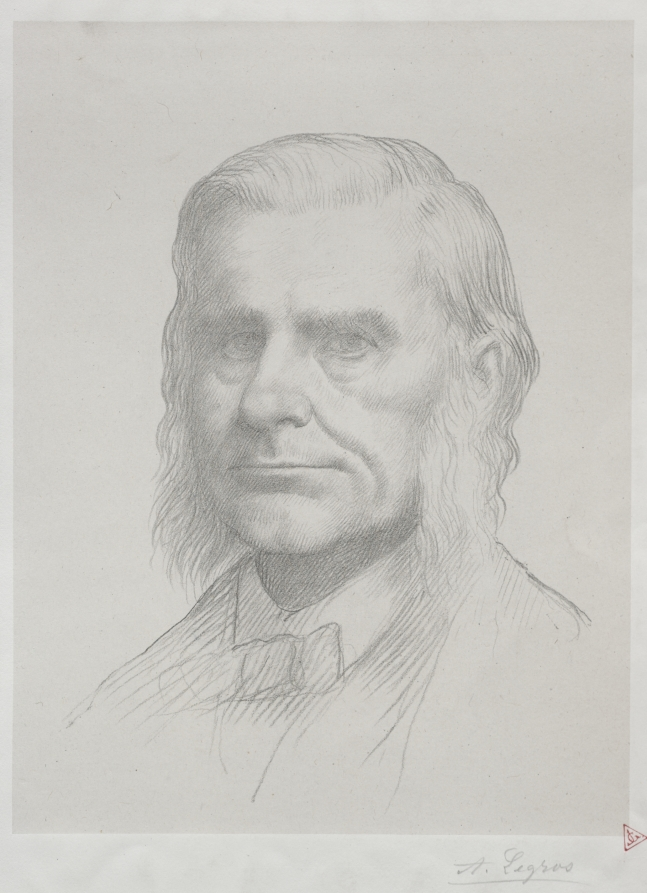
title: Portrait of Thomas Huxley (2nd Plate)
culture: France, 19th century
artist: Alphonse Legros (French, 1837–1911)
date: c. 1857–1911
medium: lithograph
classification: Print